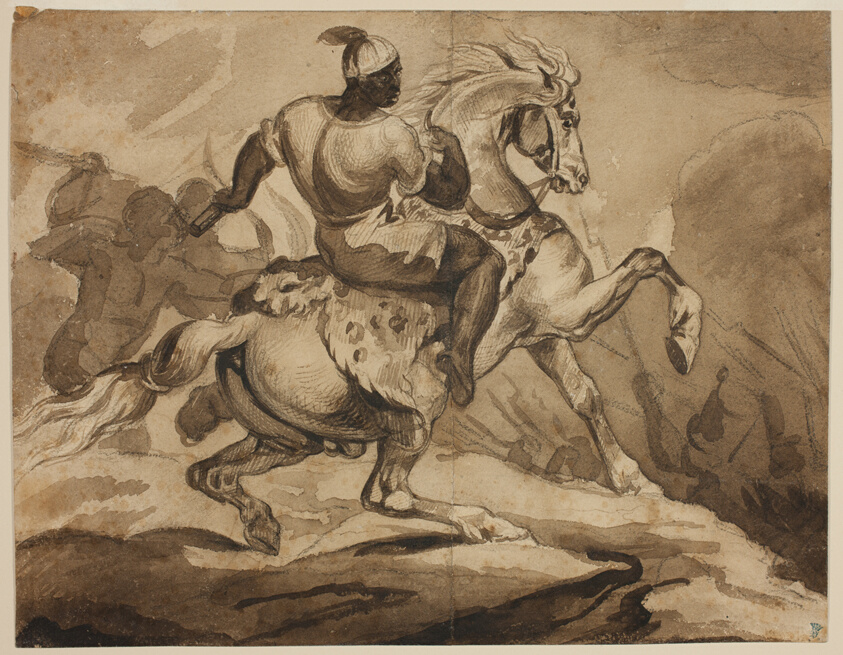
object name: Drawing and Watercolor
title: Haitian Horseman (Scene from the "French Colonial Wars")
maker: Attributed to Jean Louis André Théodore Géricault; French, 1791-1824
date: 1823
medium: Brush and brown ink and brown wash, over black chalk, on cream wove paper, pieced vertically through center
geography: France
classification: brush and ink; drawings (visual works); prints and drawing